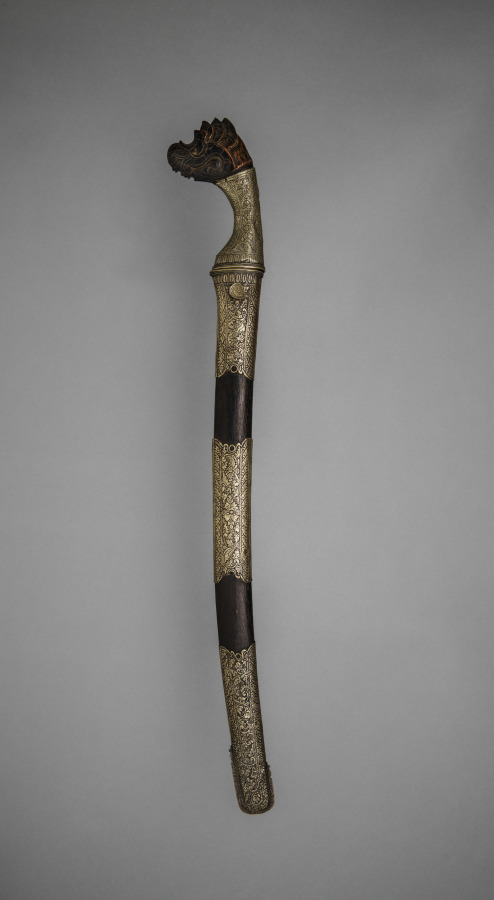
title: Sword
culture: Indonesia, Sulawesi (Celebes)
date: before 1916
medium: metal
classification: Arms and Armor